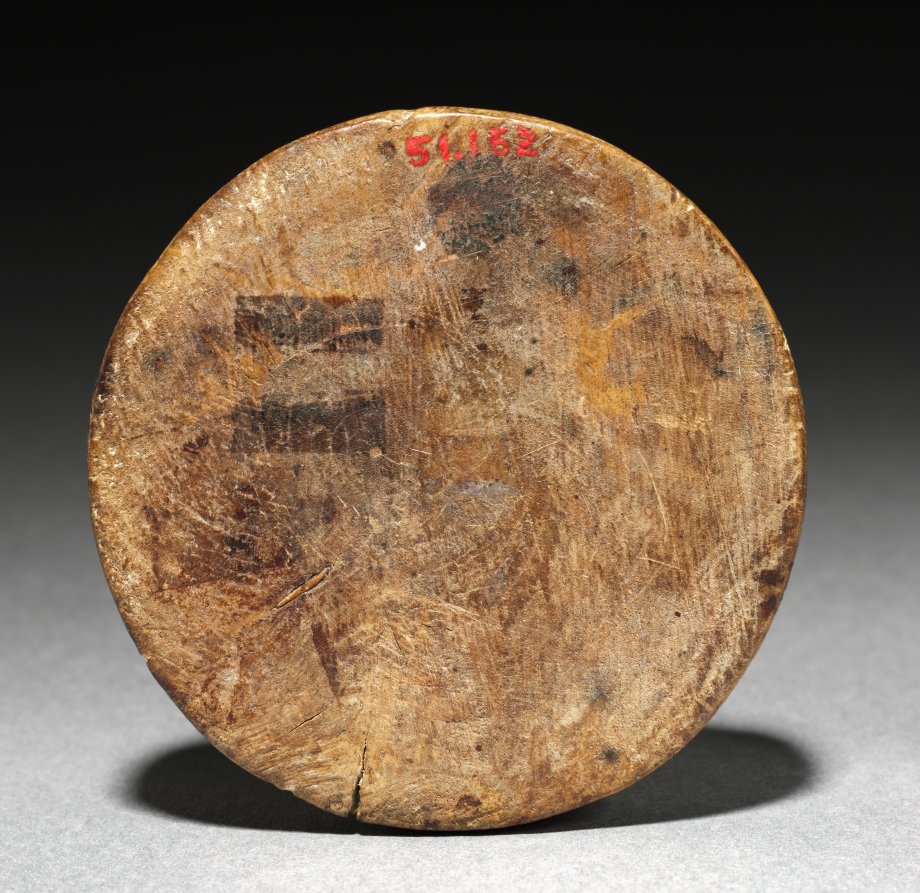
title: Mold for a Eulogia (Blessing) Bread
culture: Byzantium, Palestine, Byzantine period, 7th-10th century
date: 600s-900s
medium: wood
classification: Sculpture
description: It was a common early Christian practice to stamp images and inscriptions into loaves of bread using special molds. Representing the Church of the Holy Sepulcher on Mount Golgotha--the hill outside Jerusalem on which Christ was crucified and entombed--this wooden mold was probably used to stamp loaves of bread distributed to pilgrims visiting Jerusalem, in commemoration of their journey.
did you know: Medieval Christian pilgrims often traveled months or years to religious sites in the Holy Land and returned home with blessed mementos of their journey, such as vials of holy water, relics from saints, and even special loaves of bread. This mold was used to mark bread with an image of the Church of Holy Sepulchre in Jerusalem; the bread was then distributed to pilgrims.